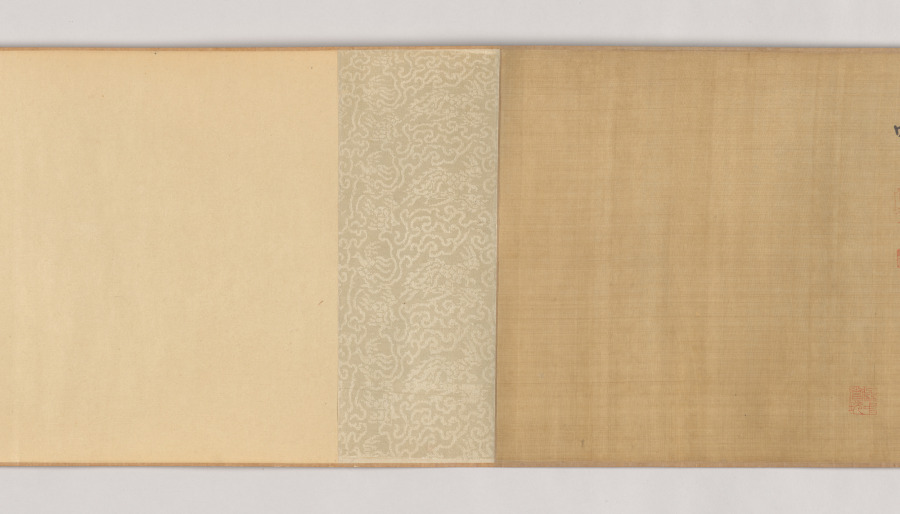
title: Three Horses and Four Grooms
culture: China, Yuan dynasty (1271-1368)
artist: Ren Renfa (Chinese, 1254–1328)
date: c. 1320s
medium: handscroll, ink and color on silk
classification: Painting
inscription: 月山道人. [印] 任氏子明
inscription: 1 colophon and 16 additional seals: 1 poem, 1 colophon dated 1552 or 1612, and 3 seals of Wang Yiying 王一瀛 (1500s); 2 seals of Liang Qingbiao 梁清標 (1620-1691); 6 seals of the Qianlong 乾隆 Emperor (r. 1736-95); 3 seals of the Jiaqing 嘉慶 Emperor (r. 1796-1821); 1 seal of the Xuantong 宣統 Emperor (r. 1908-12); 1 seal of Yu Xiezhong 余協中 (1900s).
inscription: Poem and colophon by Wang Yiying 王一瀛 (1500s): As for painters of horses in the previous dynasty, Surely the name of Yueshan [Ren Renfa] must come first. Under his brush and on his silk, They seem to have just galloped out from the imperial stud. Now as the world overflows with inferiority, Who, from the stable, can recognize a dragon-horse amidst mediocrity. Ren Yueshan [Ren Renfa] of the Yuan Dynasty was best in horse paintings. The three fine steeds he painted in this scroll are so dashing, so vigorous in spirit that they have indeed grasped some of the "brush-idea" of Han Gan. Not long ago this painting came into the possession of Mr. Gui Shanquan, who asked for my inscription. And I, while reading the old manuscripts of Hengshan [Wen Zhengming, 1470-1559], by accident, came cross the poem quoted above. As the ancients said "in painting horses, Master Han was [inspired by and produced] real horses; in composing poems, Master Su [Su Dongpo, the leading Song poet] wrote as if a painting were before him." These are truly what should be considered the two excellences; indeed, they are to be treasured. In the sixth month of the renzi year [either 1552 or 1612]. Jian feng shan ren [The Mountain Dweller of the Sword Peak], Wang Yiying, written in the Qu si ting Pavilion at Chiyang.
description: Ren Renfa's horse images are elegant in appearance and vigorous in spirit. His work attracted not only Chinese scholars but also the Mongols at the imperial court. Inspired by the contemporary scholarly interest in restoring a sense of antiquity in art—an artistic direction led by Zhao Mengfu that exerted a great impact in the Yuan art scene—Ren Renfa, like Zhao Mengfu, modeled his depictions of horses after the Song master Li Gonglin. Another key style component that Ren introduced to this genre was a revival of the Tang classical tradition. The refined color treatment of the horses as seen here was derived from the Tang master Han Gan.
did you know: Only the elegant first horse with a white blaze is accompanied by two grooms, as if its lightning speed required extra supervision.